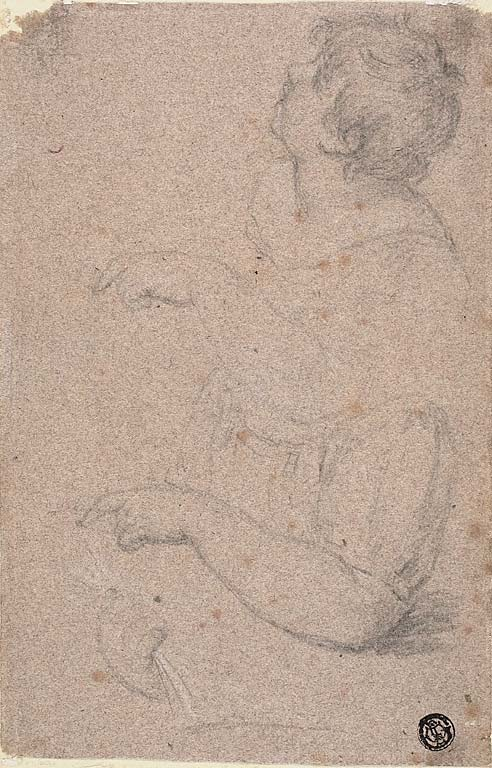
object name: Drawing and Watercolor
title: Half-Length Sketch of Child in Profile to Left, with Sketches of Right Arm and Left Hand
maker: Giovanni Battista Cipriani (Italian, 1727-1785)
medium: Black chalk, heightened with touches of white chalk, on pink laid paper with blue fibers, laid down on pale green board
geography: Italy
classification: chalk; drawings (visual works); prints and drawing